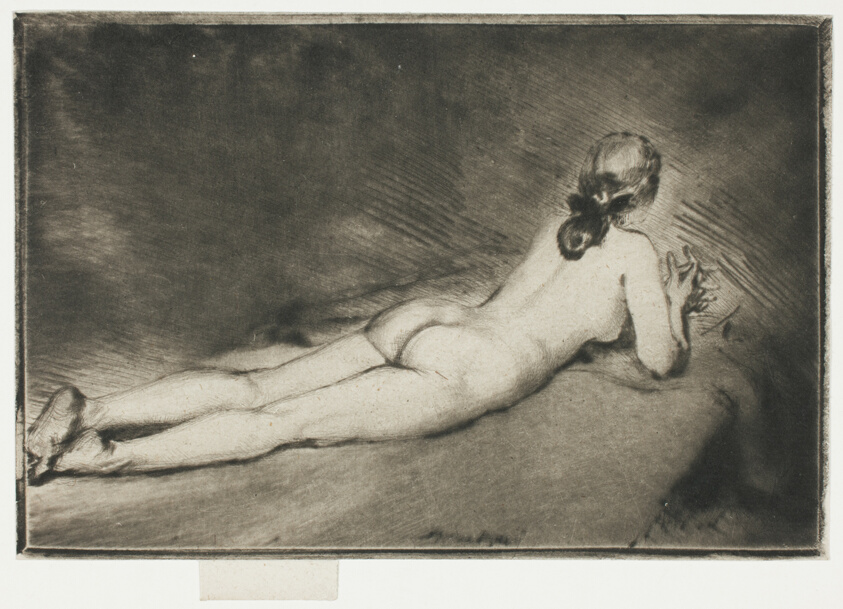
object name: Print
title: Nude Figure Lying Down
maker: Theodore Roussel (French, worked in England, 1847-1926)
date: 1906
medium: Drypoint in black on cream laid paper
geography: England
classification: drypoint; print; prints and drawing